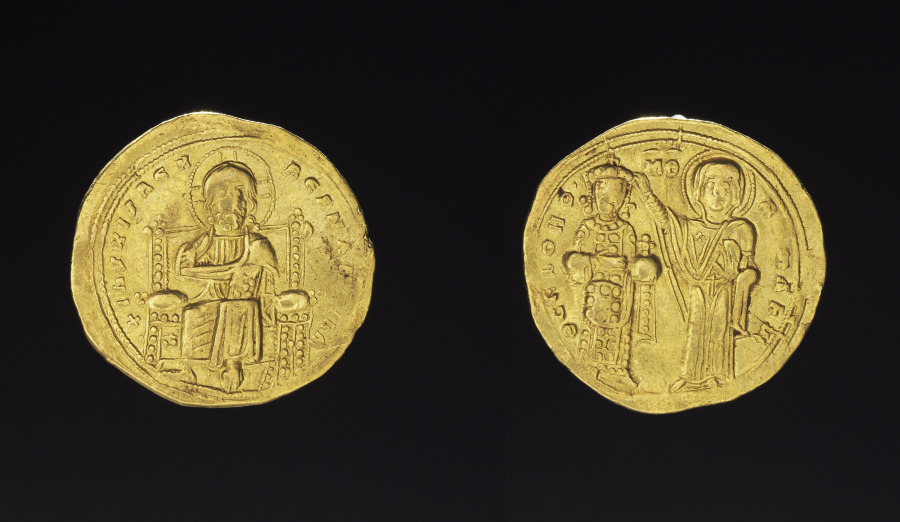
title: Histamenon of Romanus III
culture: Byzantium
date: 1028–34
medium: gold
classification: Coins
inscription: IhS XIS R?X R?GNANTInm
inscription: ?C? ?ON? R?MAn?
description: Romanus III Argyrus (968–April 11, 1034) was Byzantine emperor from November 15, 1028, until his death. He was husband of Zoe, the daughter of Constantine VII, the man Romanus was to succeed as emperor three days after wedding the daughter. He appears to have thought a lot of himself and his abilities, but in fact was inept, corrupt, and self-absorbed. His government was filled with corruption and mismanagement. He made the mistake of ignoring his wife Zoe and limiting her expenses in an effort to reduce expenditures. This would prove fatal to him as he was either poisoned or drowned (accounts differ) by the hand or order of his wife.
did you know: On one side is a seated figure of Christ enthroned, on the other the Virgin is shown touching the head of emperor Romanus III.